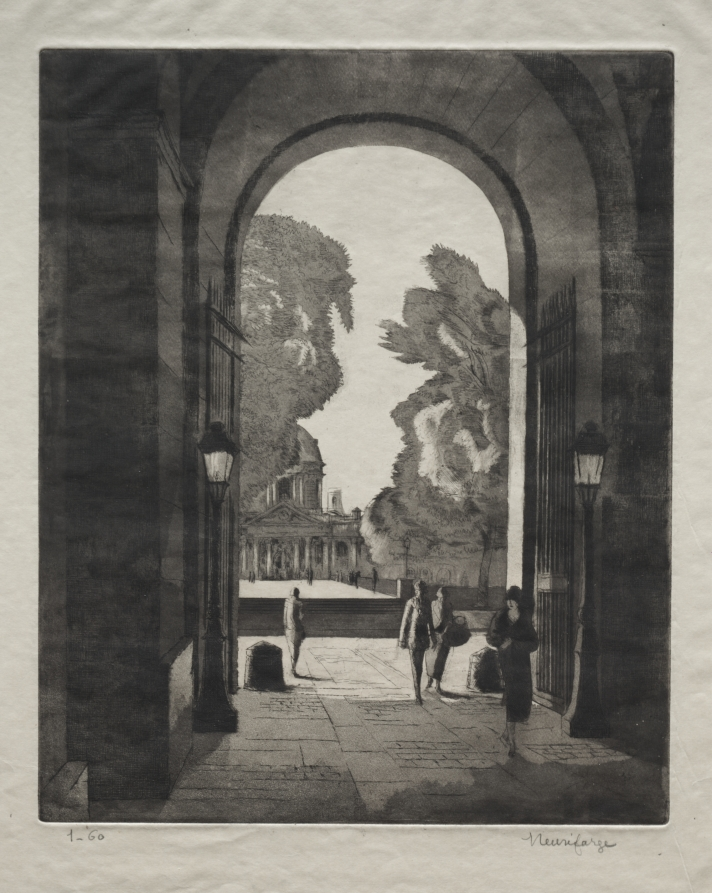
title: The Institution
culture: France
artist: Farge (French)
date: c. 1920s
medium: etching and aquatint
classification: Print